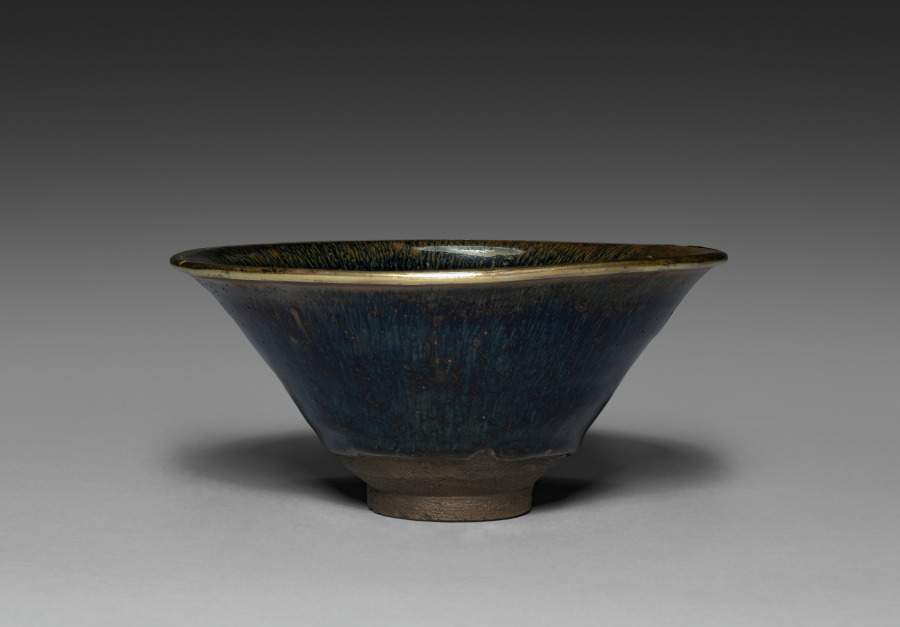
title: Tea Bowl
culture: China, Fujian province, Southern Song dynasty (1127-1279)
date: 1100s–1200s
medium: Stoneware with black “hare’s fur” glaze and metal-bound rim, Jian ware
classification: Ceramic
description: Due to its exceptional size, this Fujian tea bowl is rather rare. The enjoyment of Jian ware rests with the glaze transmutation due to iron in the glaze, which developed into reddish-brown streaks and spots against a rich black glaze after firing. Connoisseurs called these iron formations "hare’s fur" marks, and the ware was very popular with the tea cultures in China and Japan.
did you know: The reddish-brown streaks and spots have been affectionately termed "hare's fur" among connoisseurs.